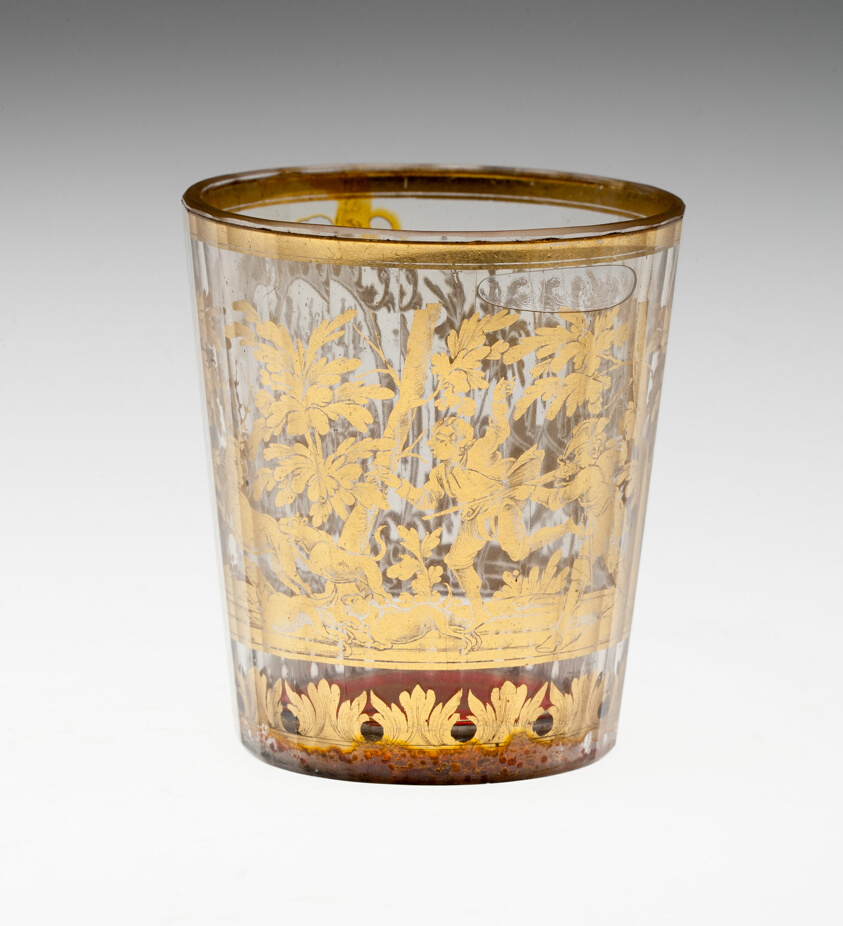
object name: Glass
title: Beaker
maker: Bohemia, Czech Republic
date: c. 1730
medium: Glass with engraved gold leaf decoration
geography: Bohemia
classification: drinking vessel; glass; european decorative arts